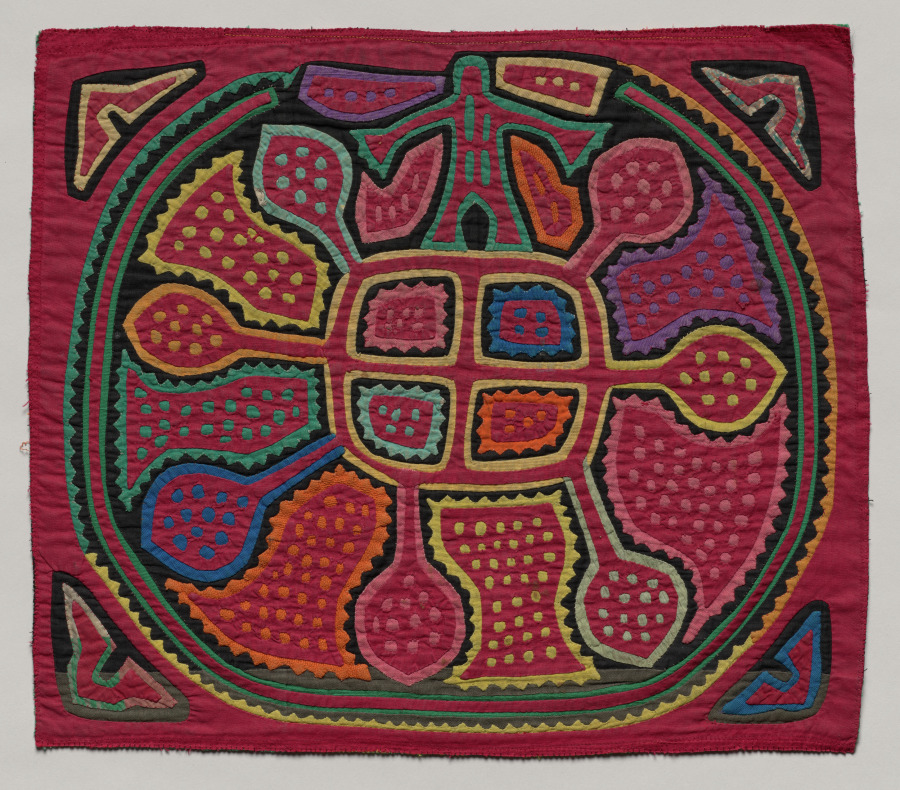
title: Mola Panel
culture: Republic of Panamá, Gunayala Comarca, Guna people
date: mid 1900s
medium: cotton, reverse applique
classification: Textile